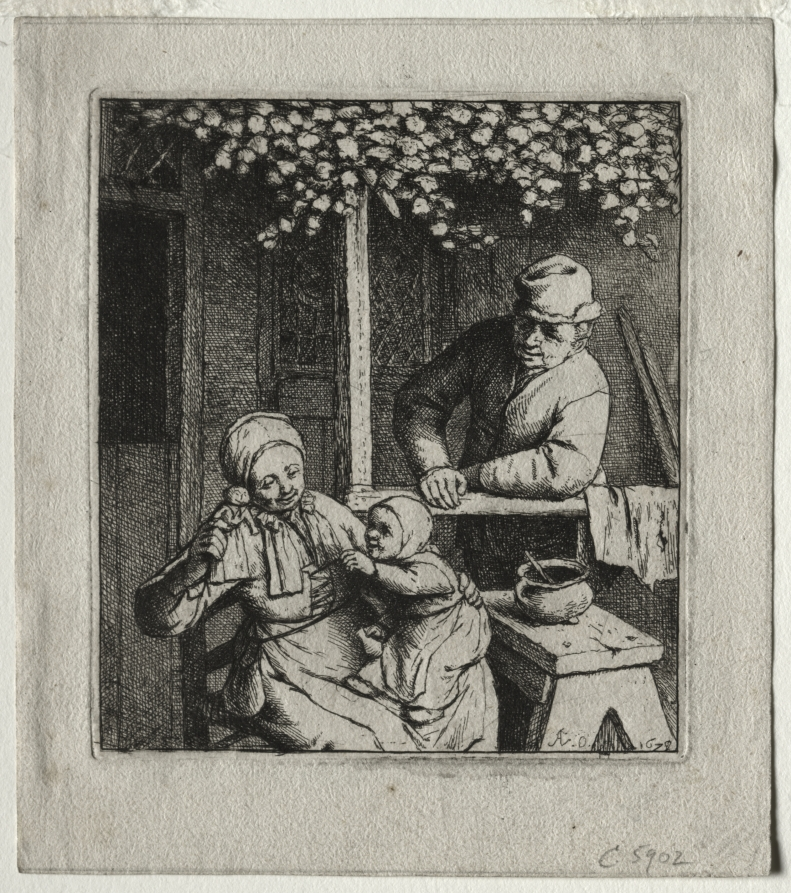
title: The Doll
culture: Netherlands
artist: Adriaen van Ostade (Dutch, 1610–1684)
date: 1678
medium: etching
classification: Print